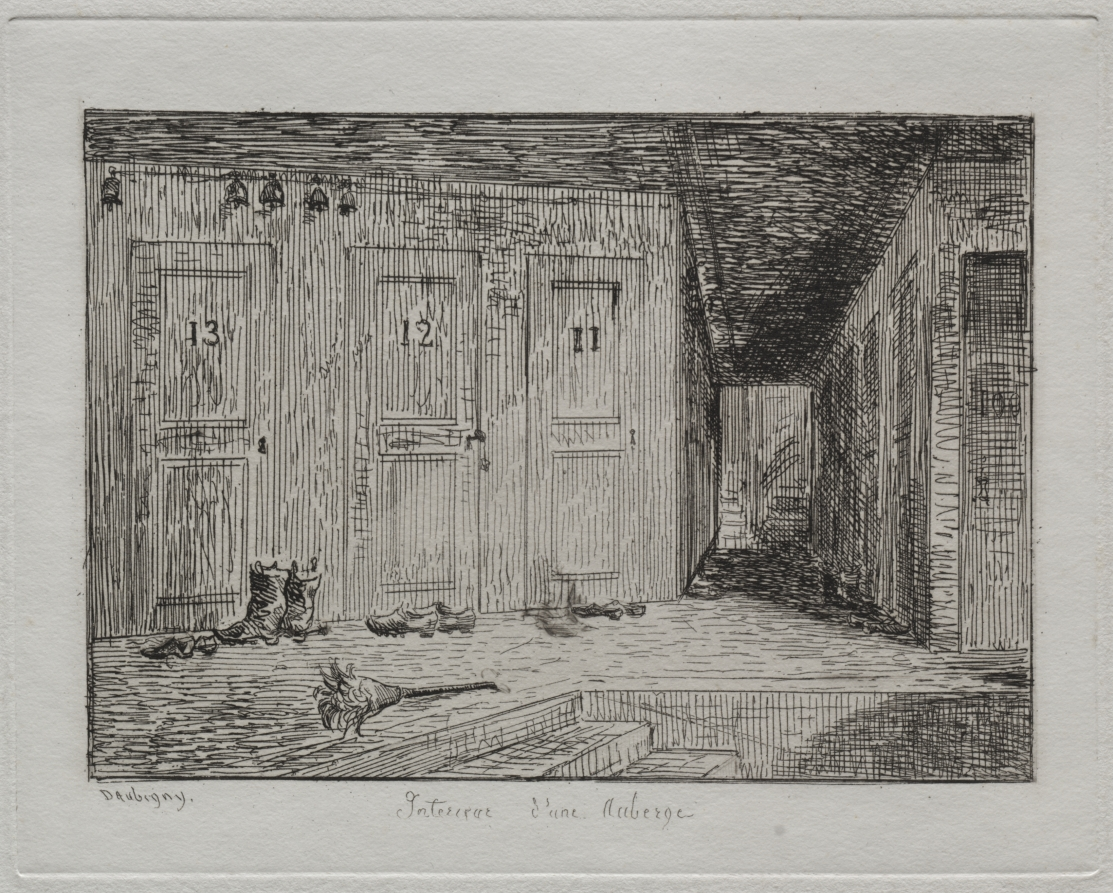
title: Interior of an Inn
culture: France, 19th century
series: Voyage en Bateau, published in 1862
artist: Charles François Daubigny (French, 1817–1878)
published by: Auguste Delâtre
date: 1861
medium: etching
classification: Print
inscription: lower left, in plate: Daubigny; lower center, in plate: Intérieur d'une Auberge